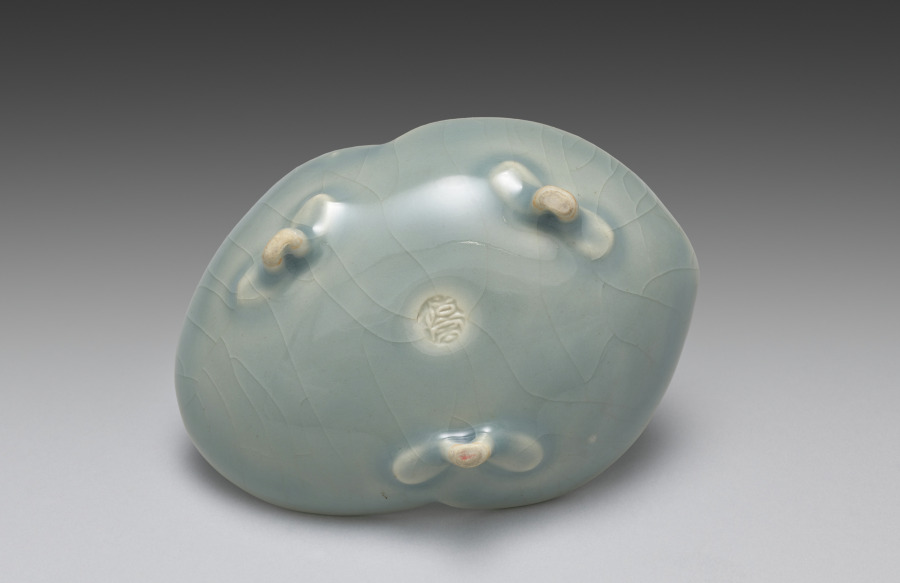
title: Dish from Saucers with Matching Shells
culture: Japan, Meiji period (1868–1912)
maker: Seifū Yohei III (Japanese, 1851–1914)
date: 1893–1914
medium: Porcelain with molded design and green crackled glaze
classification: Ceramic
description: Yohei III’s main output for his sophisticated clientele was in the form of tea sets and dining sets. He created a range of dishes in green glazes. He often produced in pairs, sets of five, or sets of ten. The set of five dishes with a more complex form is described as having a “water-colored glaze” (mizuiroyū). These are shaped like clam half shells, a reference to a game in which shell halves painted with narrative scenes or a variety of motifs must be matched back together by the players. The dishes have molded details to articulate the shell forms, and the crackling across each shell adds another dimension to the surface. Each dish is set on three small feet, formed by a pinched piece of clay and attached to an unglazed area on the underside of the dish. Curiously, while four of the dishes are stamped with the artist’s mark, one has instead a signature carved into the base.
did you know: The saucers are meant to look like matched halves of clam shells in reference to a once popular game.